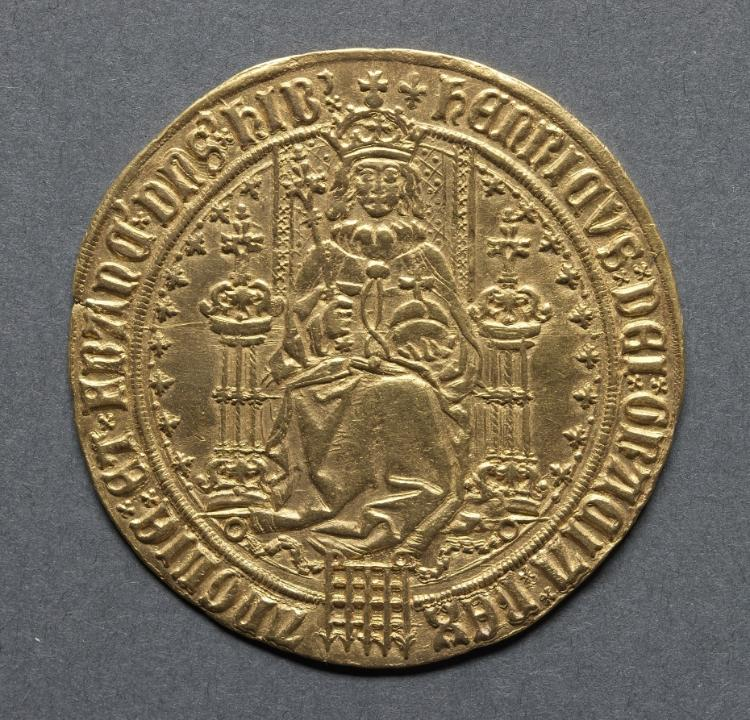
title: Sovereign: Henry VII (obverse)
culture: England, Henry VII, 1485-1509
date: 1504–1509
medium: gold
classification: Coins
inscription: HENRICIUS DEI GRATIA, REX, ANGLIAE, FRANCIAE, ET HIBRNIA DNS HIB